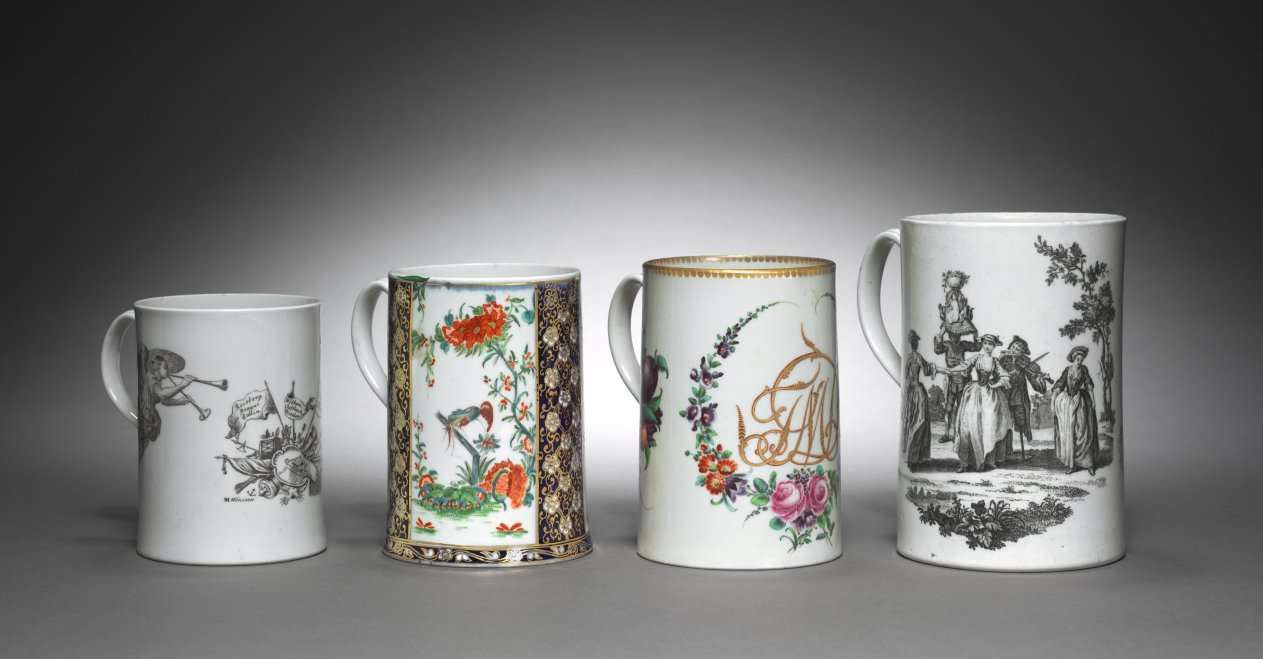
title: Cann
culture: England, 18th century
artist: Chelsea Porcelain Factory (Britain, London, 1745–84)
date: c. 1800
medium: porcelain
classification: Ceramic